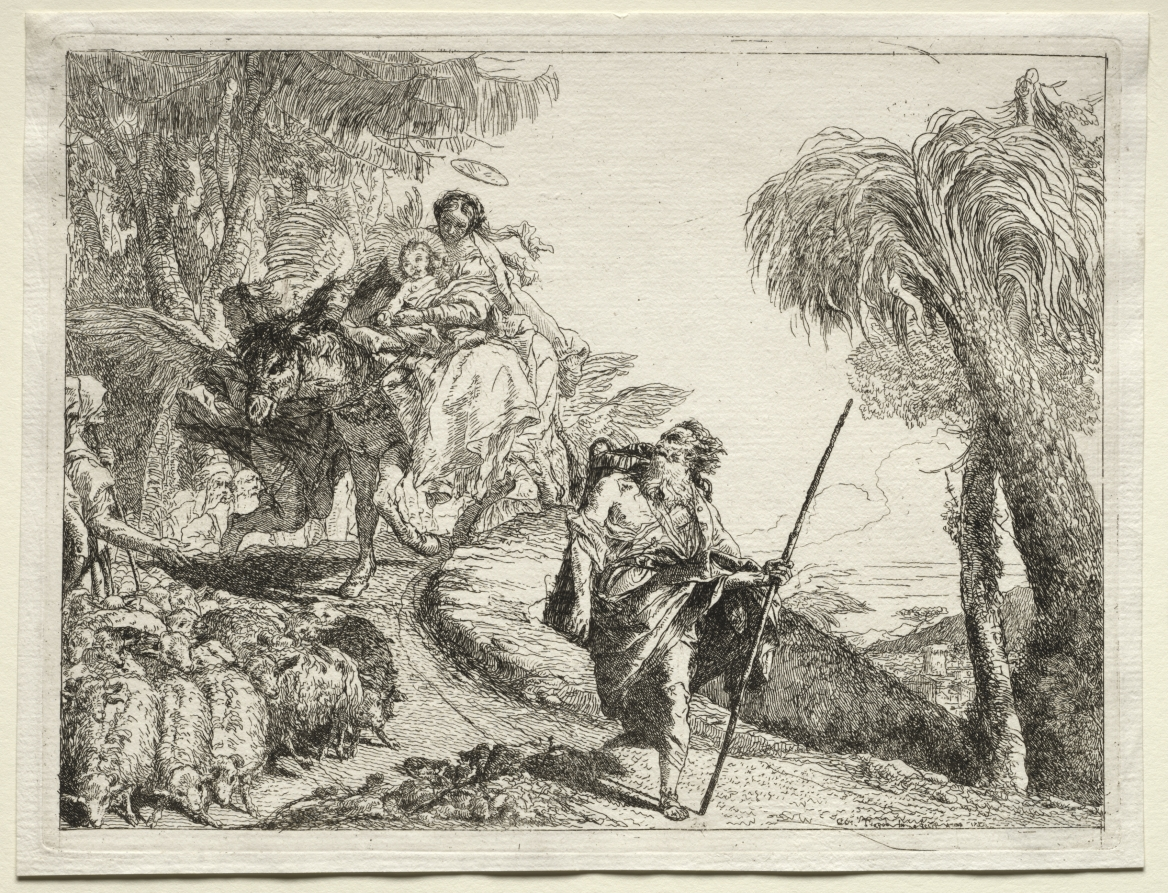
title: Flight into Egypt: The Holy Family and the Flock of Sheep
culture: Italy, 18th century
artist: Giovanni Domenico Tiepolo (Italian, 1727–1804)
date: 1750–53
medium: etching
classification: Print